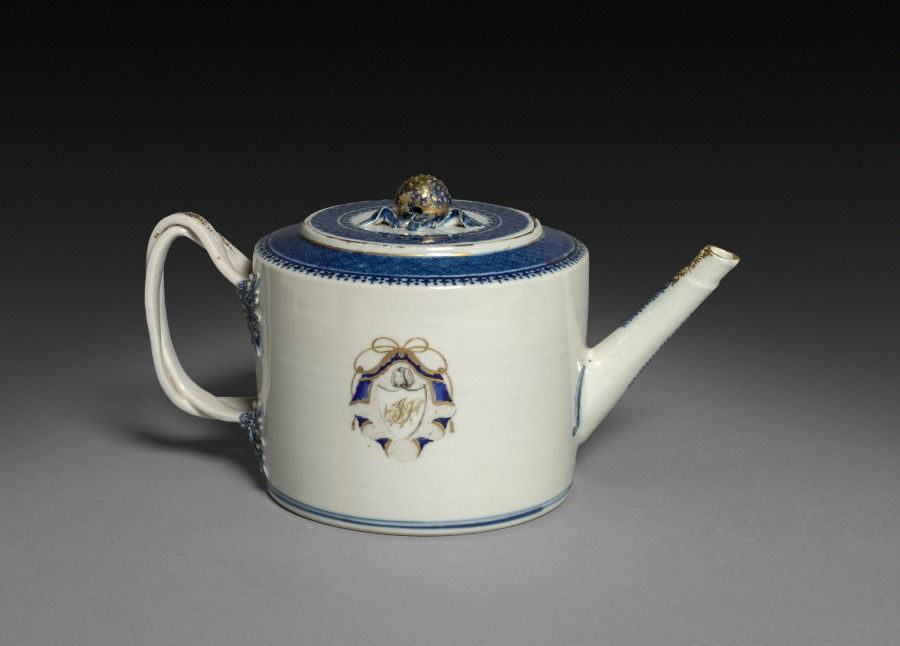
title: Teapot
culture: China, Chinese Export -- English or American Markets, 18th century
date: c. 1775–1800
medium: porcelain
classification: Ceramic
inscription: on body of teapot, in heraldic shields: "JS."